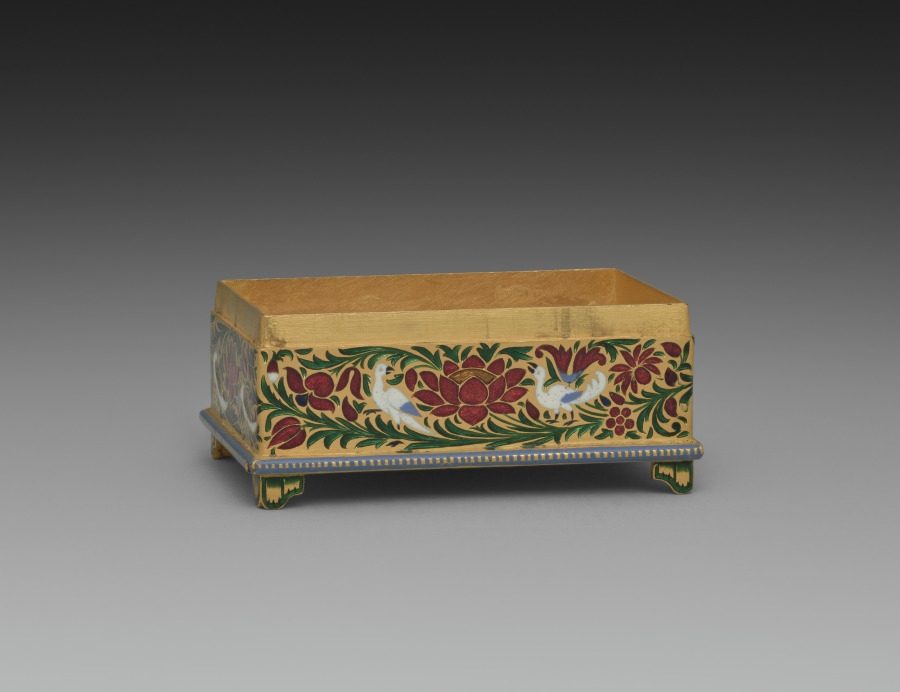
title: Box Decorated with Shiva, Vishnu, Krishna, and Ganesha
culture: Northwestern India, Rajasthan, Rajput Kingdom of Jaipur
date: c. 1800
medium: gold with enamel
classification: Metalwork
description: This box is covered in a variety of birds, animals, and plants. The central motifs on the lids include images of four Hindu gods: Shiva, Krishna, Vishnu, and Ganesha. The blue figures are Vishnu and Krishna, the latter of which is an incarnation of the former who is shown playing a flute. The elephant-headed Ganesha is red and accompanied by his mount, the bandicoot rat Dinka. The four-armed Shiva is paired with two animals, including a tiger and his sacred bull mount Nandi. Small enamel boxes could be used to house many different substances, from cosmetics to spices to stimulants, including opium and paan, a digestive typically given at formal gatherings as a sign of the host’s hospitality.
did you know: The sides have pairs of birds, while a single bird adorns the underside.